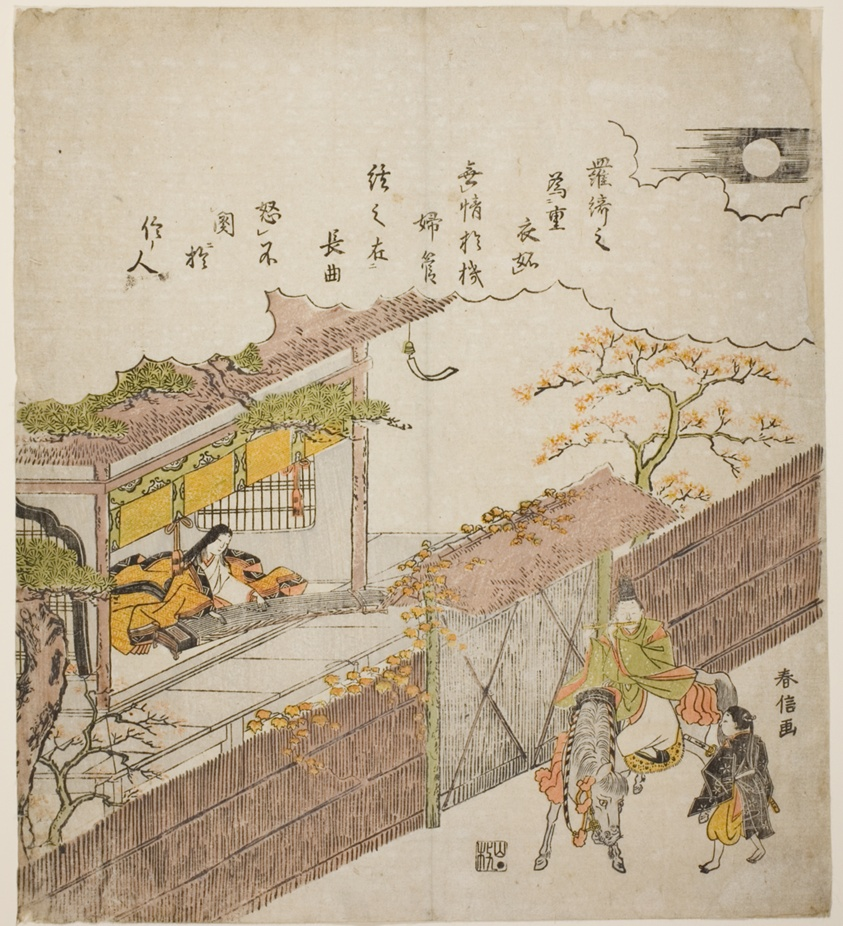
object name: Print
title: Kogo no Tsubone and Minamoto no Nakakuni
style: Japanese (culture or style)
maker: Suzuki Harunobu 鈴木 春信; Japanese, 1725 (?)-1770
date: early 1760s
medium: Color woodblock print; uncut double hosoban, benizuri-e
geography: Japan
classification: woodblock print; print; asian art